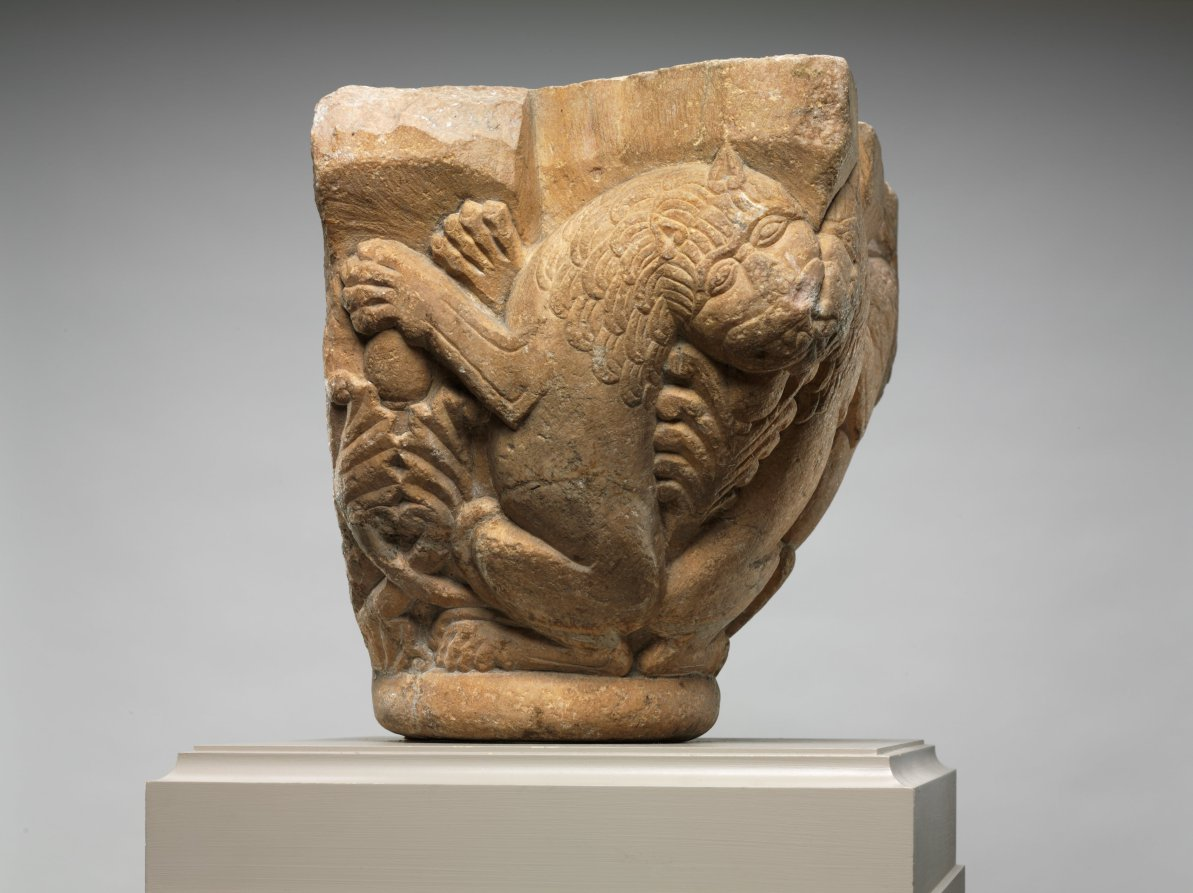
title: Engaged Capital with Lions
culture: Northern Spain (Navarre ?) or Southwest France (Pyrénées or Roussillon ?), mid-12th century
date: 1145–64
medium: marble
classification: Sculpture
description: The compositional motif of confronted and addorsed beasts illustrated on this capital was especially popular in churches along the pilgrimage roads.